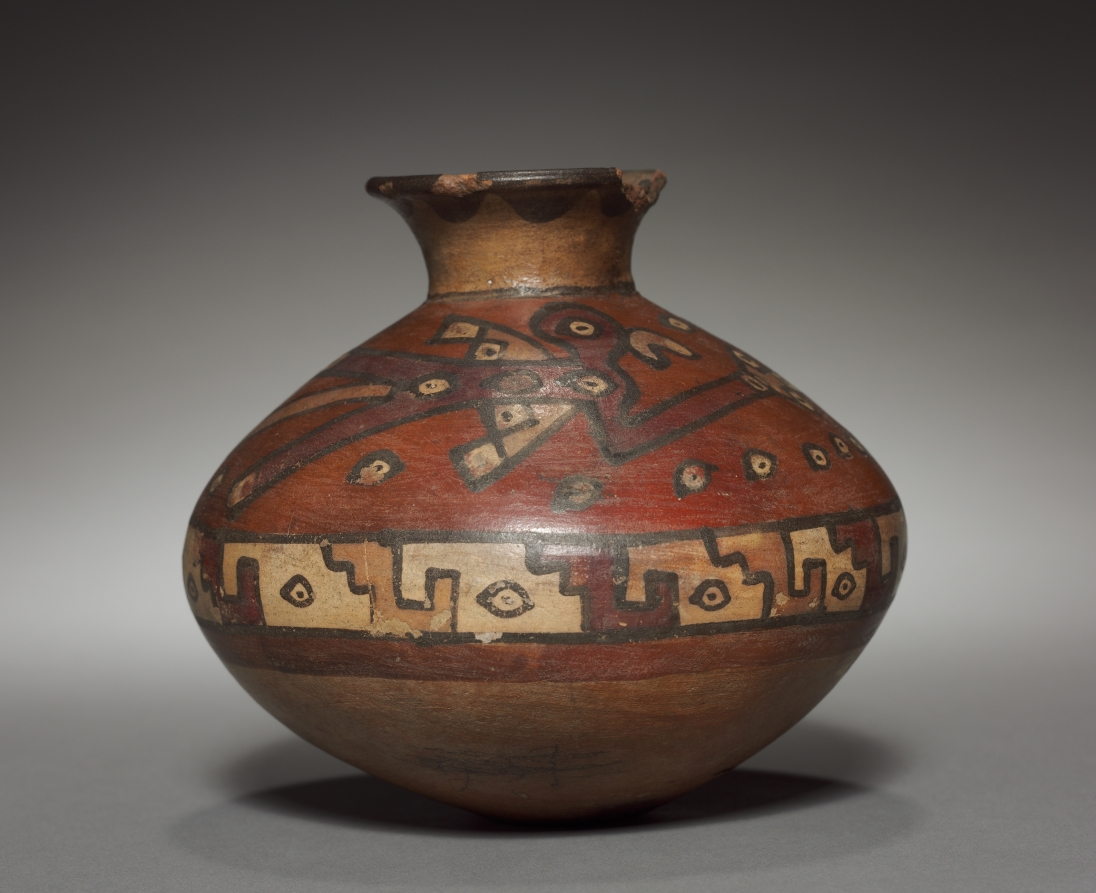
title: Vessel with Bird Designs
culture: Peru, South Coast, Middle Horizon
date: 700–1000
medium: pottery with burnished, colored slips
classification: Sculpture